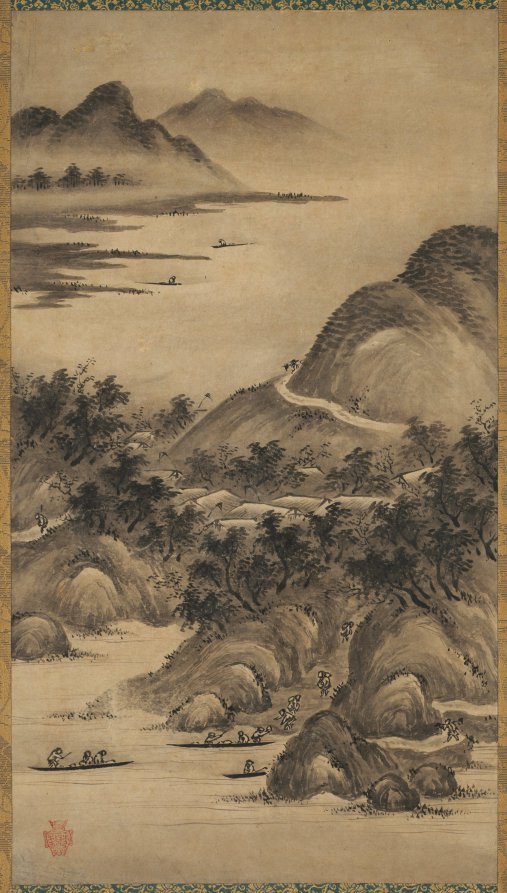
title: Seasonal Landscapes: Summer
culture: Japan, Muromachi period (1392–1573)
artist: Kano Hideyori (Japanese, active mid- to late 1500s)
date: mid- to late 1500s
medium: hanging scroll, ink on paper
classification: Painting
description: Now comprising three scrolls, this composition was originally a set of four paintings depicting the seasons. The set is among the most important of the artist’s surviving works. Each painting was executed in the gyō mode, indicating a speedy brush with rounded strokes. The terms shin (formal), sō (cursive), and gyō (semicursive), borrowed from calligraphy terminology, are terms commonly used by connoisseurs to describe brushwork in ink paintings.